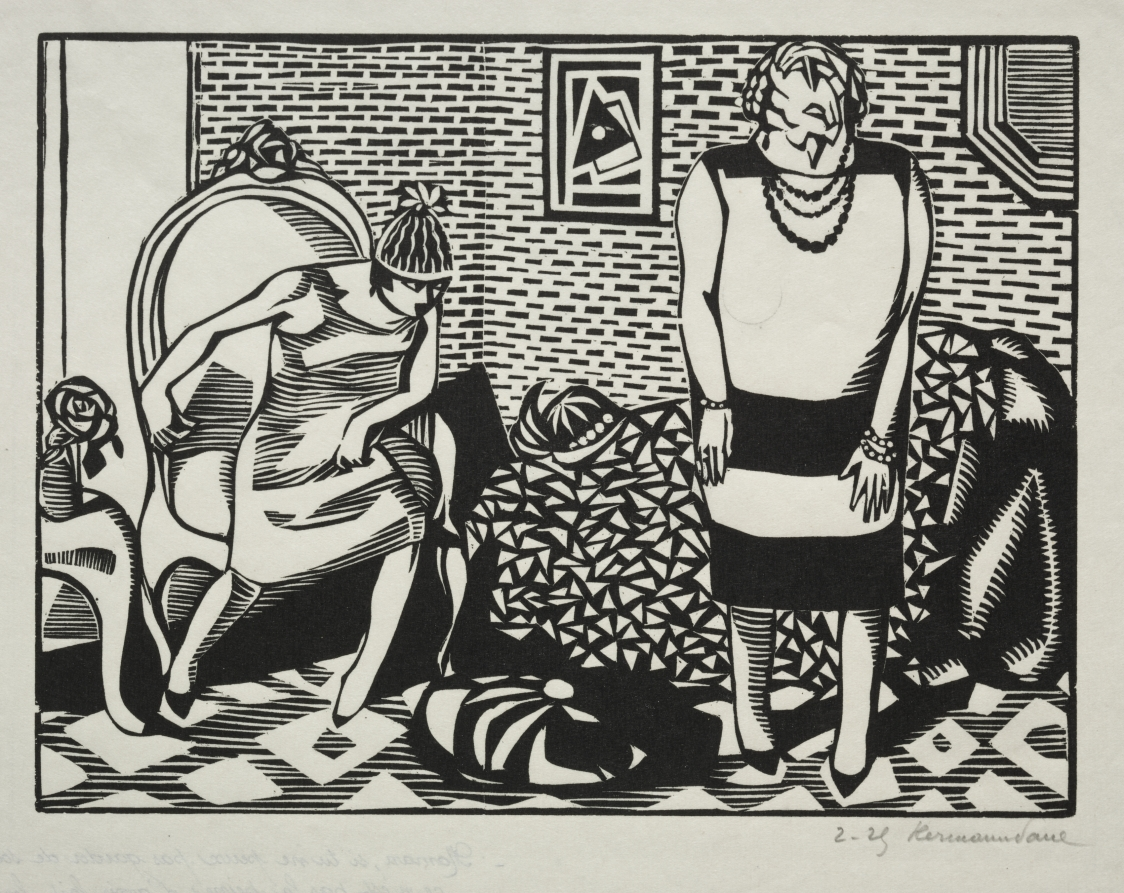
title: Mama, si tu ne peux pas garder de souliers ce n'est pas la peine d'avoir fait fortune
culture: France, 20th century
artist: Hermann Paul (French, 1864–1940)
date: c. 1920s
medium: woodcut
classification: Print